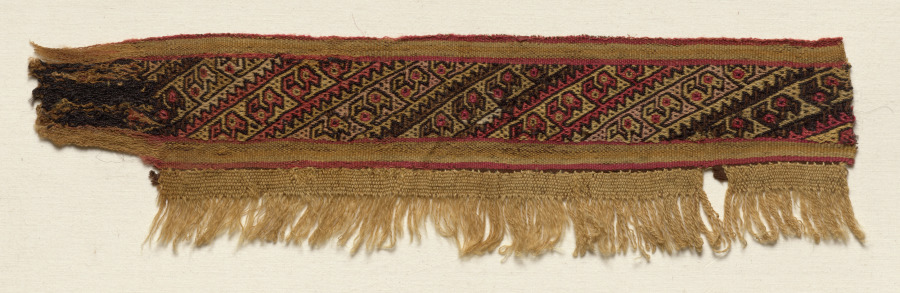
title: Three Fragments of a Border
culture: Peru, Central Coast, Chancay, 12th-15th century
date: c. 1100–1400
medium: tabby with inset border of fancy twill, brocaded; cotton and wool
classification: Textile